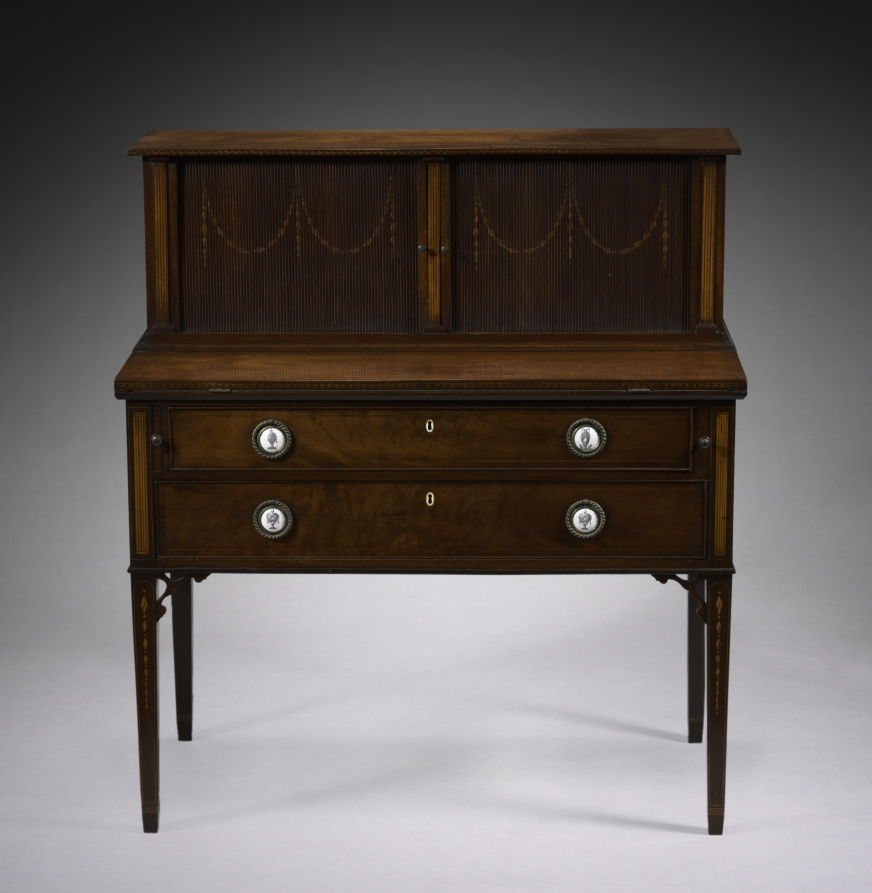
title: Tambour Desk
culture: America, Boston, early 19th Century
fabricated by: John Seymour (American, 1738–1818)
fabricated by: Thomas Seymour (American, 1771–1848)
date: c. 1800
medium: mahogany, brass and enamel pulls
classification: Furniture and woodwork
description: The severely rectilinear form, delicate inlay, sliding tambour doors, and blue-painted interior of this small desk relate it to the work of the English-born cabinetmaker John Seymour and his son, Thomas, who were in partnership in Boston during the years around 1800. The Seymours made some of the most sophisticated American furniture in the Hepplewhite style, so-called from the Englishman whose publication of furniture designs was widely influential on both sides of the Atlantic.